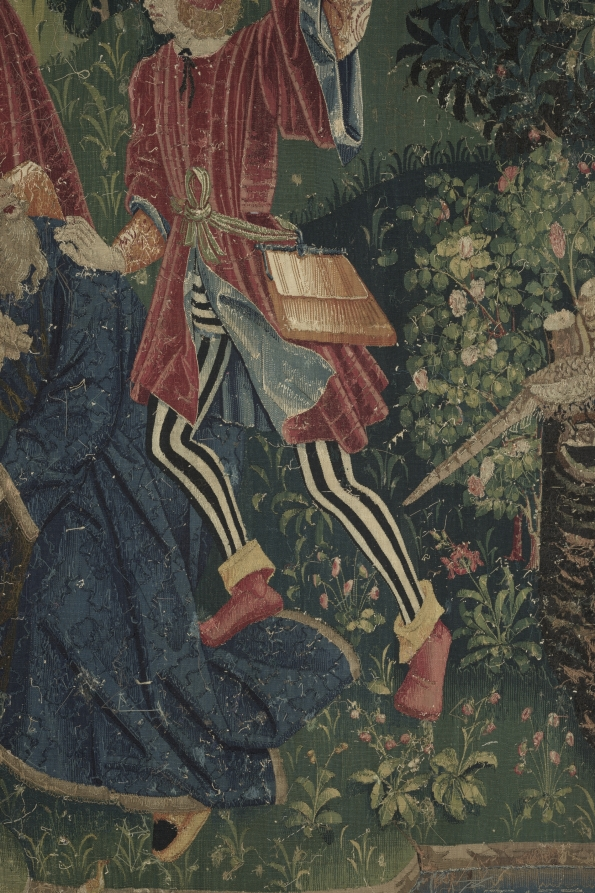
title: Time (from Chateau de Chaumont set)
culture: France, Lyon(?), early 16th century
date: 1512–15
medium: silk and wool; tapestry weave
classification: Tapestry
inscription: French verse in Gothic letters translates as follows: "One sees the weather adorned in green, Sometimes as pleasing as an angel; To suddenly change and be quite strange, The weather never stays the same."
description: Pierre Sala, who likely commissioned the set, is portrayed as the richly attired central figure offering a bouquet, a symbol of knowledge, to Éléonore, his daughter. Éléonore is pregnant, revealed by her upturned skirt and the persimmon in her husband Hector’s hand. Hector’s mother, Marguerite, in dark attire, will wed the widowed Sala in 1519. They appear in front of the royal chateau of Blois. The figures at the right convey Sala’s advice to his children. Time (the old man with the staff) with Clio, the Muse of History, standing on his shoulders, is being attacked by a Herculean youth wielding a stick. With this allegory, Sala is explaining that youth is ignorant of the complexities of life and time. The small unicorn at the far right represents the soul. The verse in Old French at the top refers to changing time: One sees Time adorned with green foliage, Sometimes as pleasant as an angel, Then suddenly change and become quite strange. Never does Time persist in one state.